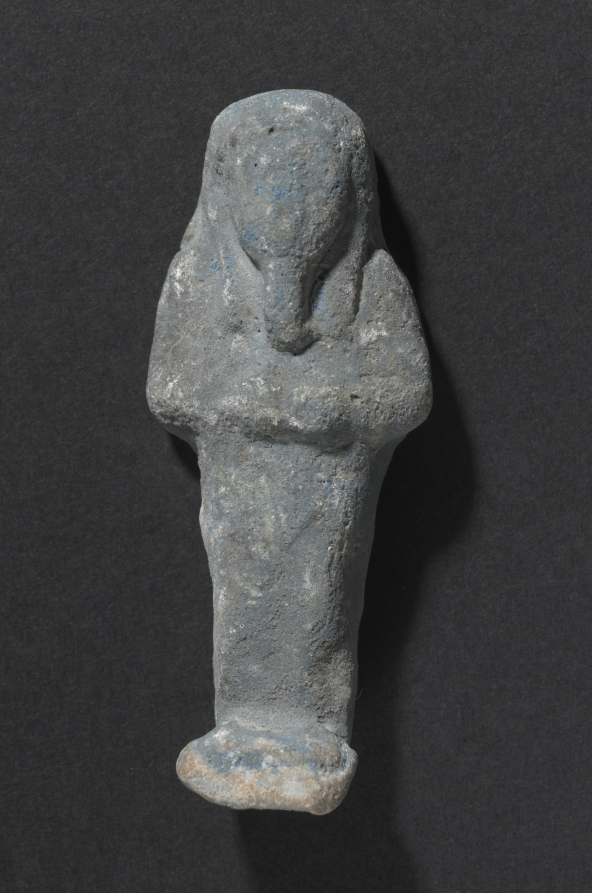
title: Shawabty of Ditamenpaankh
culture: Egypt, Late period (715–332 BCE), Dynasty 25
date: 715–656 BCE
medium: terracotta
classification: Funerary Equipment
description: High demand for shawabtys in the Late Period, a time when as many as 400 or more shawabtys were placed in the tomb with the deceased, gave rise to a specialized container for storing them: the shawabty box. This example is inscribed for the lady of the house, Ditamenpaankh, and was probably one of a pair originally made for her. The single-masted boat on the box's lid is perhaps an allusion to the pilgrimage of the deceased to the holy city of Abydos, the cult city of Osiris, king of the dead. The shawabtys inside are crude, mass-produced examples cast in an open mold. Made of terracotta, their blue paint imitates more costly shawabtys made of faience. As for the shawabty spell, it has been removed from its traditional location on the shawabty's front and relocated onto the sides of box, where it needed only to be written once, thus expediting production.